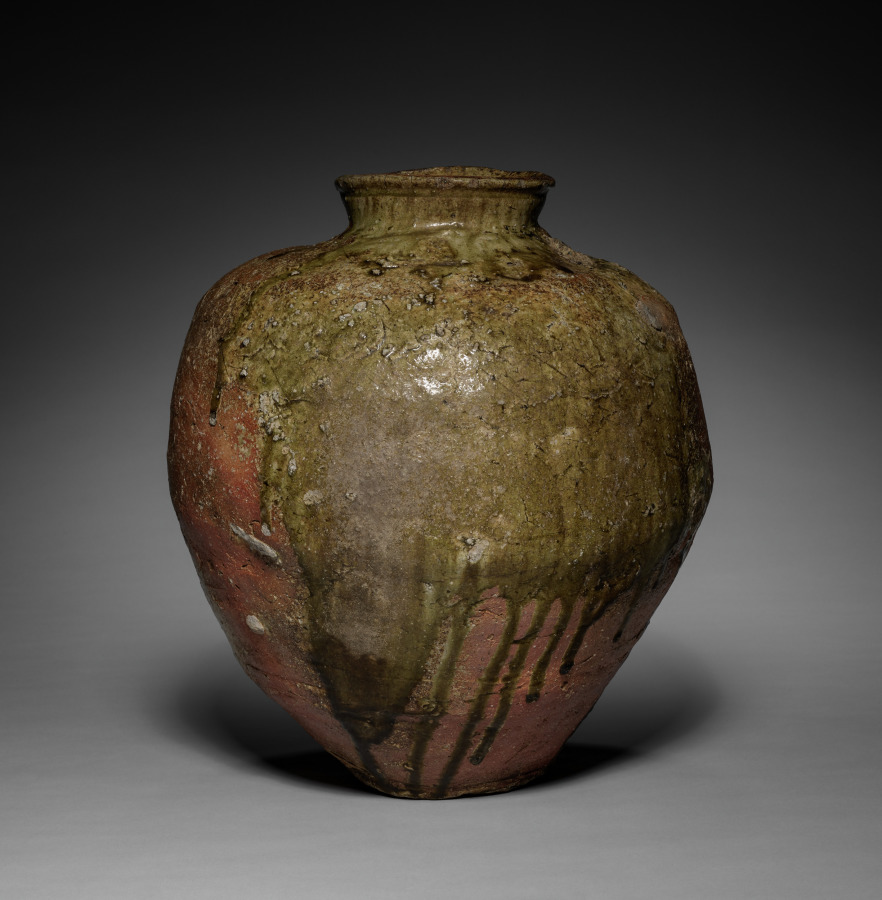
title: Large Jar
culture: Japan, Muromachi period (1392–1573)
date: 1400s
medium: stoneware with natural ash glaze (Shigaraki ware)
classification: Ceramic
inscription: Box inscription (front): 「不明」壺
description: The orange color of this jar comes from iron in the clay. Natural ash glaze settled on the vessel during firing. Originally intended for grain storage, rustic containers like this one were also prized by tea enthusiasts, who appreciated the uncalculated beauty of the glaze and the asymmetry of these humble objects. They used them to store tea leaves.